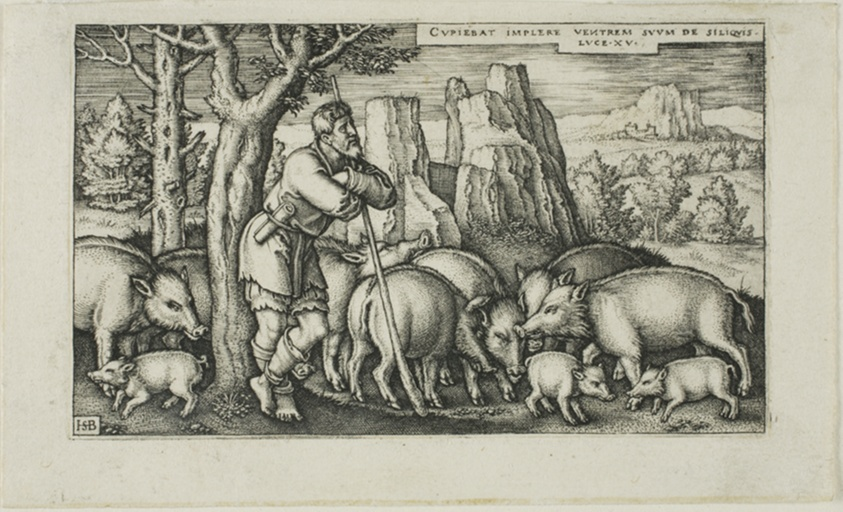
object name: Print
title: The Prodigal Son with the Swine, plate three from The History of the Prodigal Son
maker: Sebald Beham; German, 1500-1550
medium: Engraving in black on ivory laid paper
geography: Germany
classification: engraving; print; prints and drawing